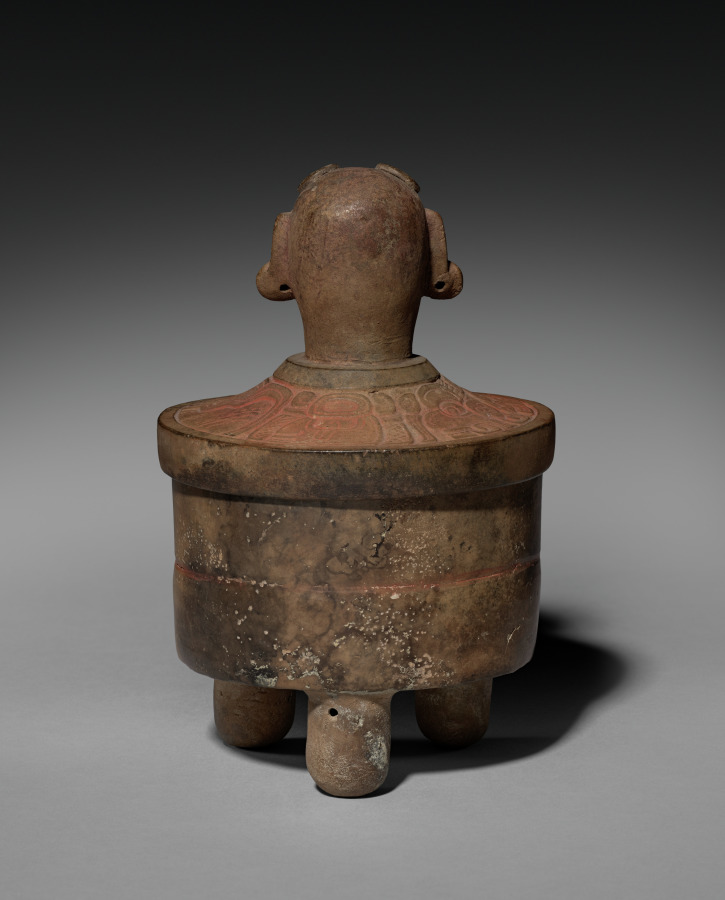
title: Tripod Vessel with Lid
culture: Mexico or Central America, Maya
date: 250–600 CE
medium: earthenware with pigment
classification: Ceramic